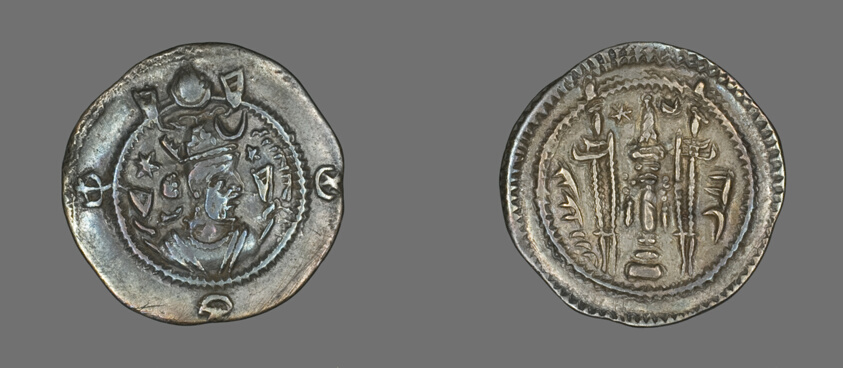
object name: Coin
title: Coin Portraying King Chosroes II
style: sassanian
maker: Sasanian; Persia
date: 590-628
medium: Silver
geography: Roman Empire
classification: coin; ancient art